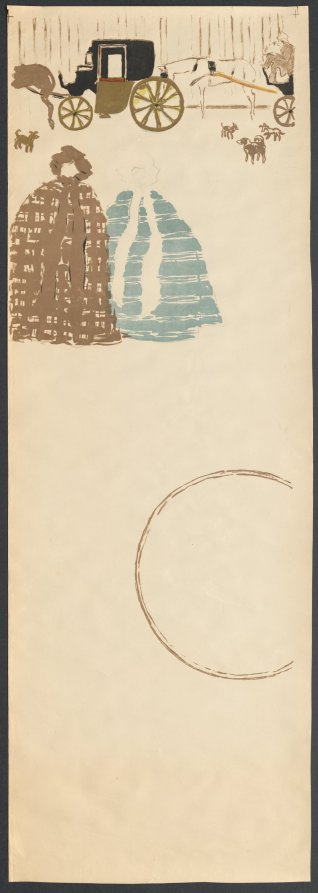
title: Nursemaids’ Promenade, Frieze of Carriages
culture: France, 19th century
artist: Pierre Bonnard (French, 1867–1947)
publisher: Molines, Galeries Lafayette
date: 1895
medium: color lithograph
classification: Print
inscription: The third panel signed with the artist's monogram in the stone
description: This charming scene of a nanny and her three charges extends across four panels meant to be mounted as a folding screen. Pierre Bonnard emulated the solidly colored flat forms of Japanese color woodcut prints, which he collected. He featured the screen in his first solo exhibition at Paris's prestigious Galeries Durand-Ruel in 1896.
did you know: Although this screen was issued in an edition of 110, only about 20 copies survive today.